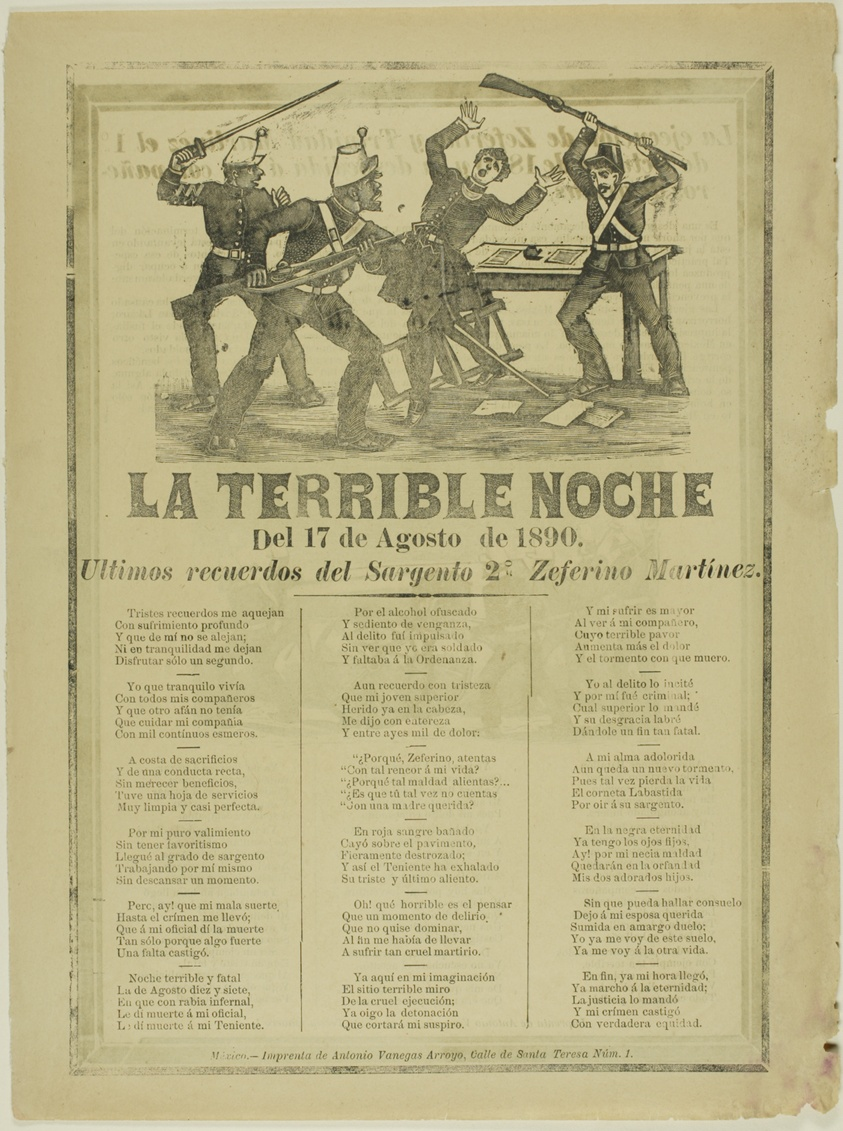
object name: Print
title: The Terrible Night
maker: José Guadalupe Posada (Mexican, 1852-1913)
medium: Relief etching on paper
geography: Mexico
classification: relief etching; print; prints and drawing